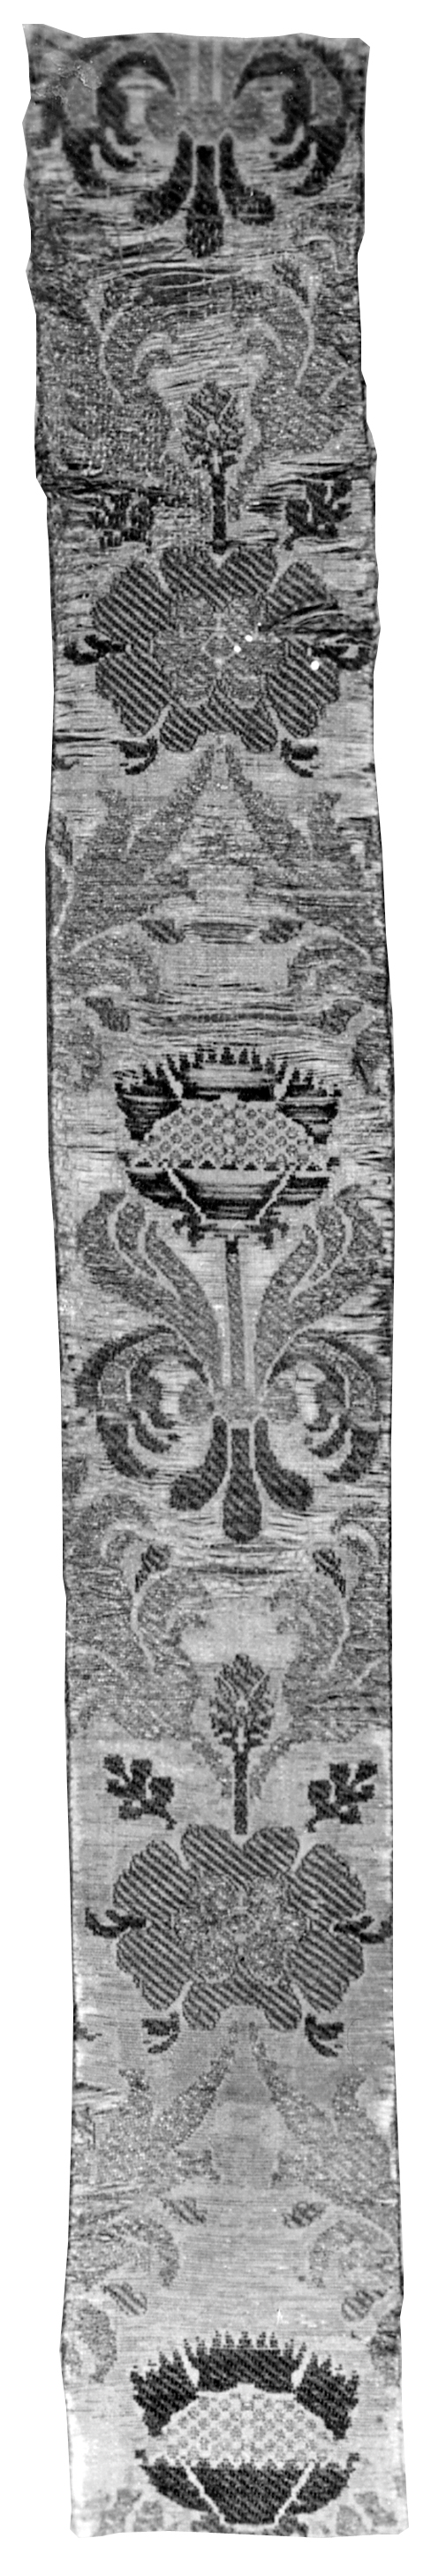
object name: Textile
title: Fragment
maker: Italy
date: 1600/50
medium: brocaded silk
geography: Italy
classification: textile; weaving